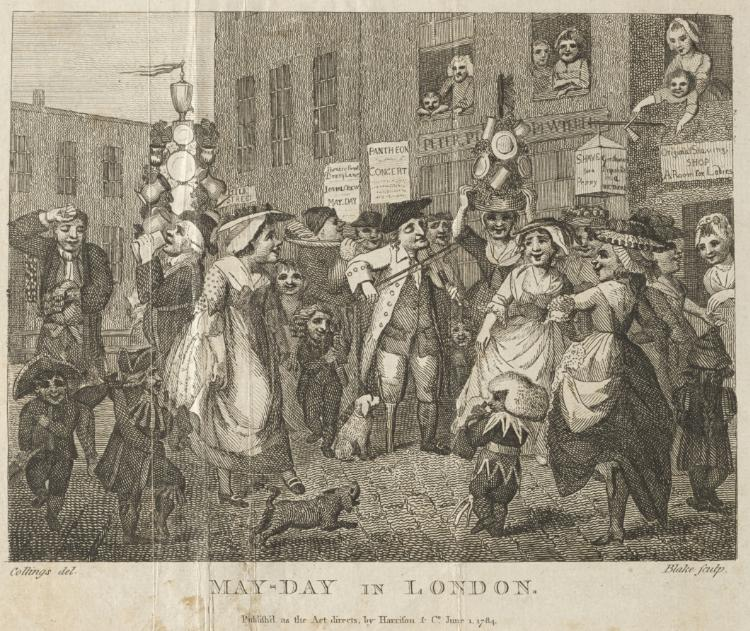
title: May-Day in London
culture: England, 18th century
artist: William Blake (British, 1757–1827)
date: 1784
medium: engraving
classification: Print